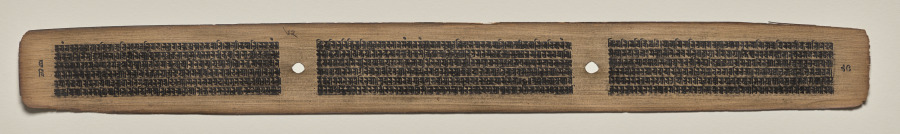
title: Text, Folio 62 (verso), from a Manuscript of the Perfection of Wisdom in Eight Thousand Lines (Ashtasahasrika Prajnaparamita-sutra)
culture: Eastern India, Bihar, Vikramashila Monastery. Painting: Nepal, Kathmandu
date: Sunday, September 14, 1119 (year 239 of the Newar Samvat in the month of Ashvina)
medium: gum tempera and ink on palm leaves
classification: Painting